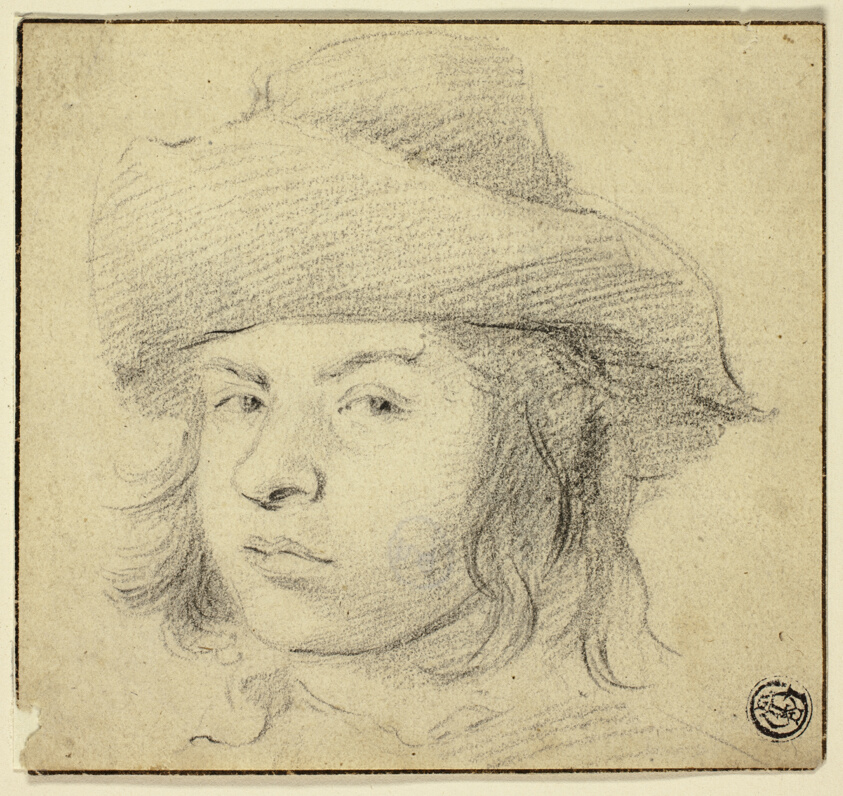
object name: Drawing and Watercolor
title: Bust of Young Man with Hat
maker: Attributed to Cornelis Visscher; Dutch, c. 1629-1658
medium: Black chalk on tan laid paper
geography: Holland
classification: chalk; drawings (visual works); prints and drawing